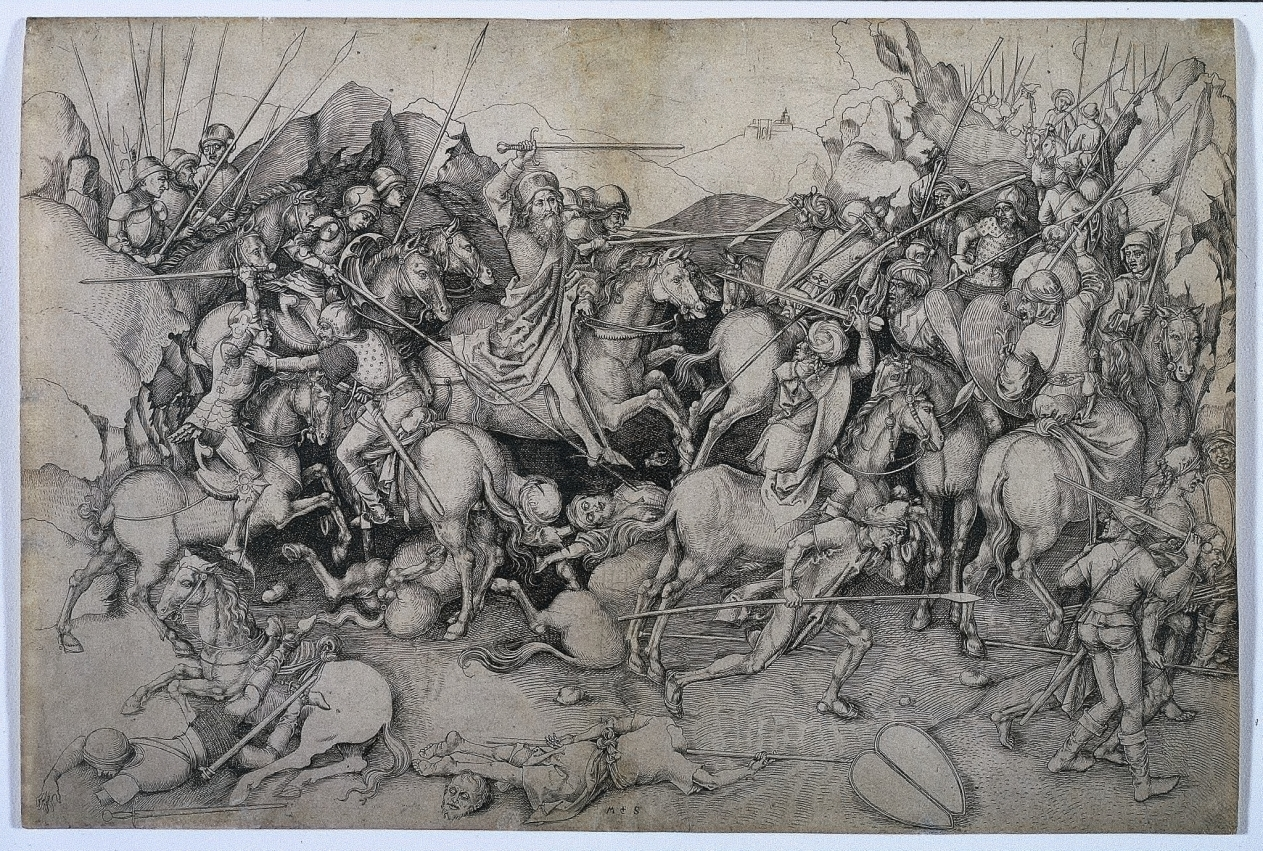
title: The Battle of St. James the Greater at Clavijo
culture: Germany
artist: attributed to Martin Schongauer (German, c. 1450–1491)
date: 1470–75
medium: engraving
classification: Print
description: According to legend, in 846 A.D. during a battle in Clavijo, one of the Christ's apostles and the patron saint of Spain, Saint James the Greater, miraculously appeared on the battlefield and helped the Christian armies of the Spanish king Ramirez defeat Muslim forces. Martin Schongauer portrays the climax of the battle, as Saint James appears on his steed at the center of the scene amidst gruesome beheaded corpses and dismembered limbs. The saint is brandishing a sword and wearing a scallop shell on his hat--an emblem adopted and worn by pilgrims during their travels to James's burial place, the Spanish Cathedral of Santiago de Compostela.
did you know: In this unfinished plate, the shield in the right foreground, the fallen horse at the bottom left, the points on the lances of the soldier in the upper left corner, and the hilly landscape are all details left uncompleted.